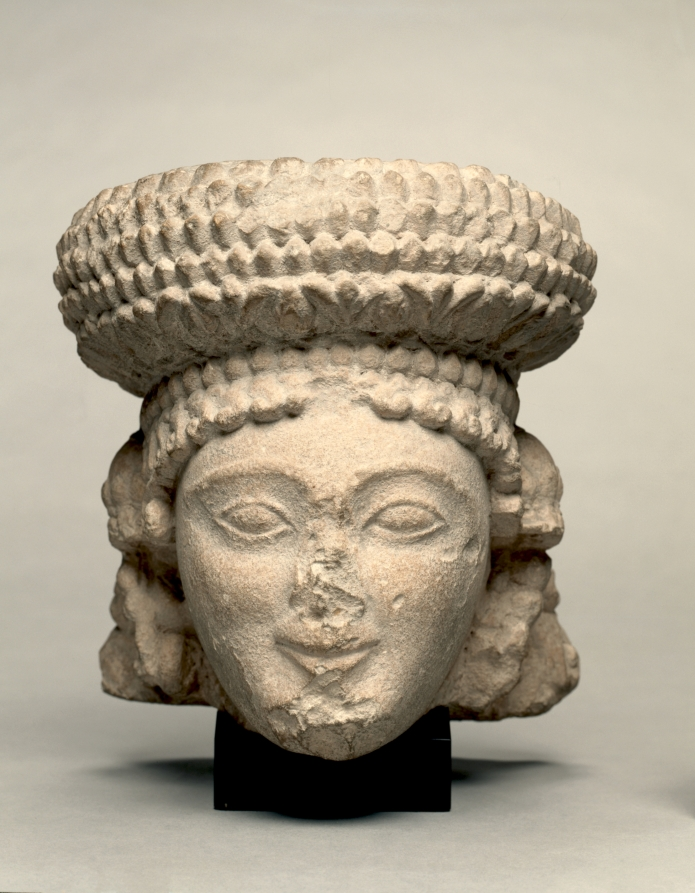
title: Head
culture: Cyprus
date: 500–300 BCE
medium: limestone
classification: Sculpture